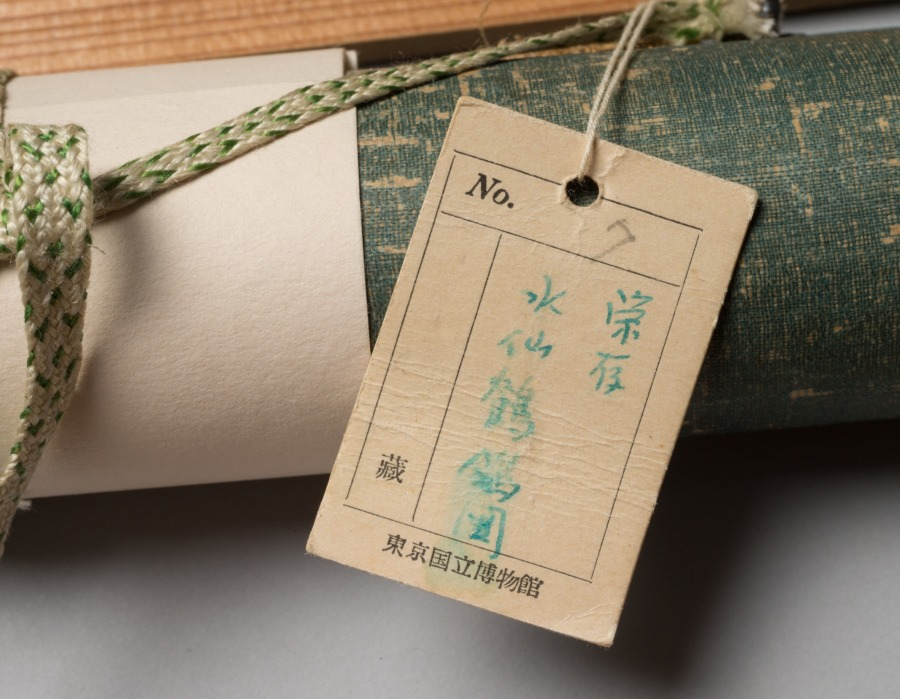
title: Wagtails and Narcissus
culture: Japan, Muromachi period (1392–1573)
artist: Eison (Japanese)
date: mid-1500s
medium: hanging scroll; ink on paper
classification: Painting